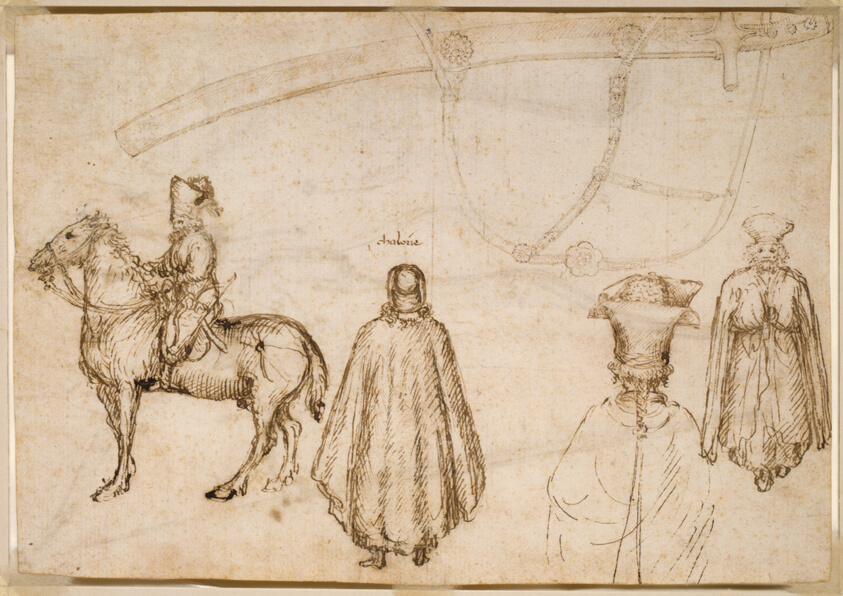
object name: Drawing and Watercolor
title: Sketches of the Emperor John VIII Palaeologus, a Monk, and a Scabbard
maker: Pisanello (Italian, by 1395-c. 1455)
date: 1438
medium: Pen and brown ink on ivory laid paper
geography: Italy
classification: pen and ink drawings; drawings (visual works); prints and drawing